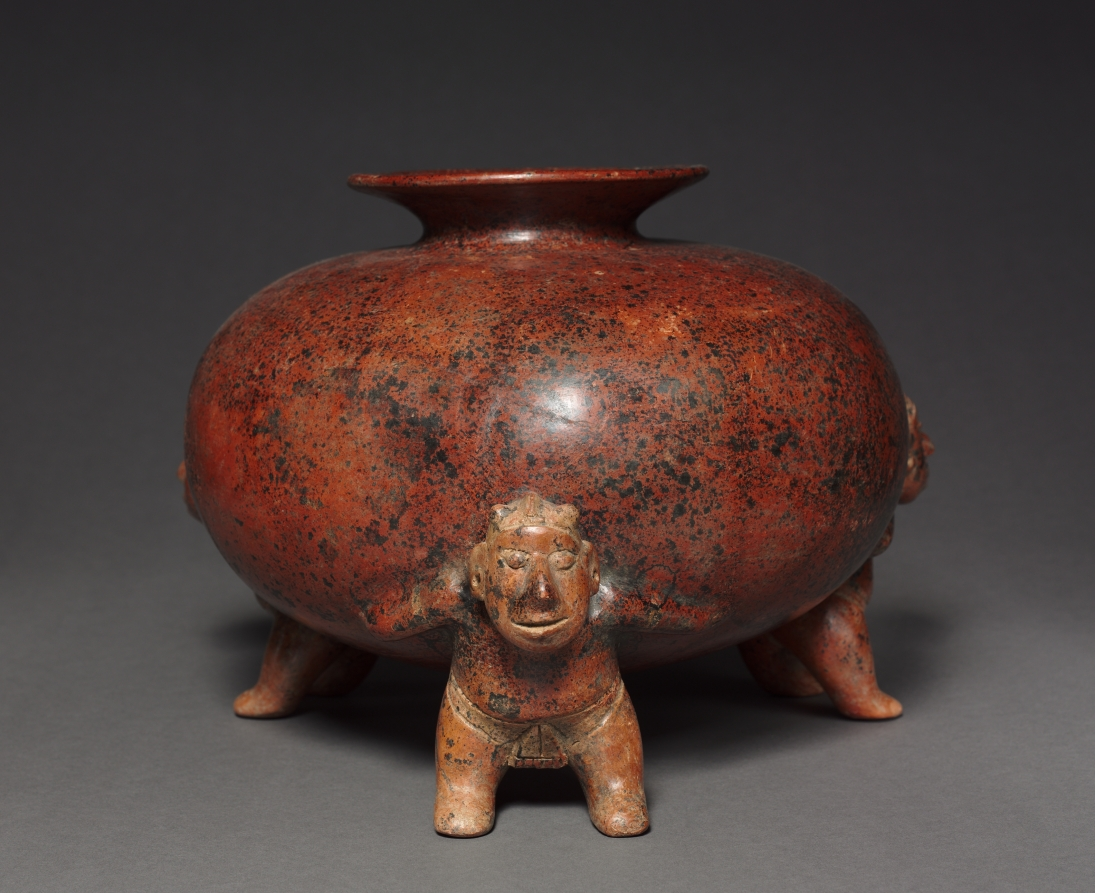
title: Vessel with Crested Atlantean (Supporting) FIgures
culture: West Mexico, Colima, Comala style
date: 200 BCE–300 CE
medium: earthenware with colored slip, black burial deposits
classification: Ceramic